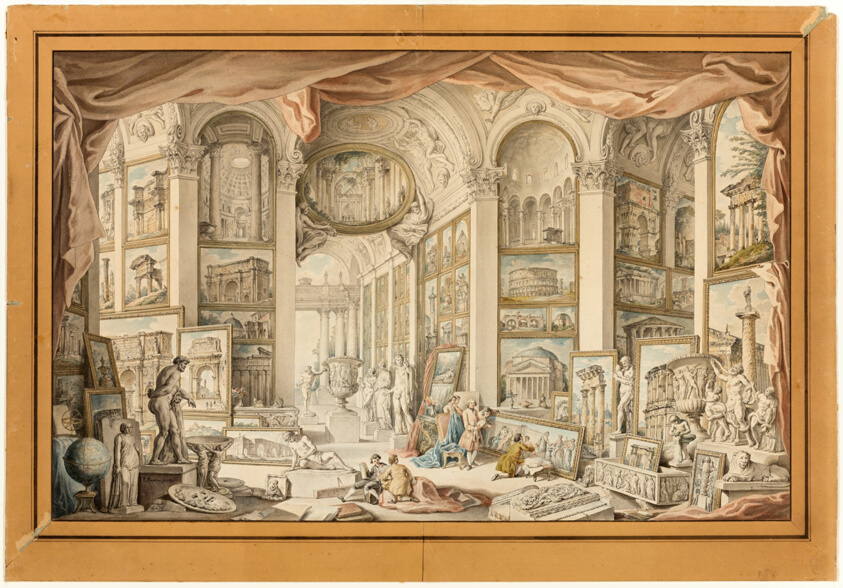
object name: Drawing and Watercolor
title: Roma Antica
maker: After Giovanni Paolo Pannini; Italian, 1691-1765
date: 1757/60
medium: Pen and black ink, watercolor, and brush and gray wash, heightened with touches of white gouache, over graphite, on ivory laid paper, laid down on cream laid card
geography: Italy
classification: watercolor; drawings (visual works); prints and drawing